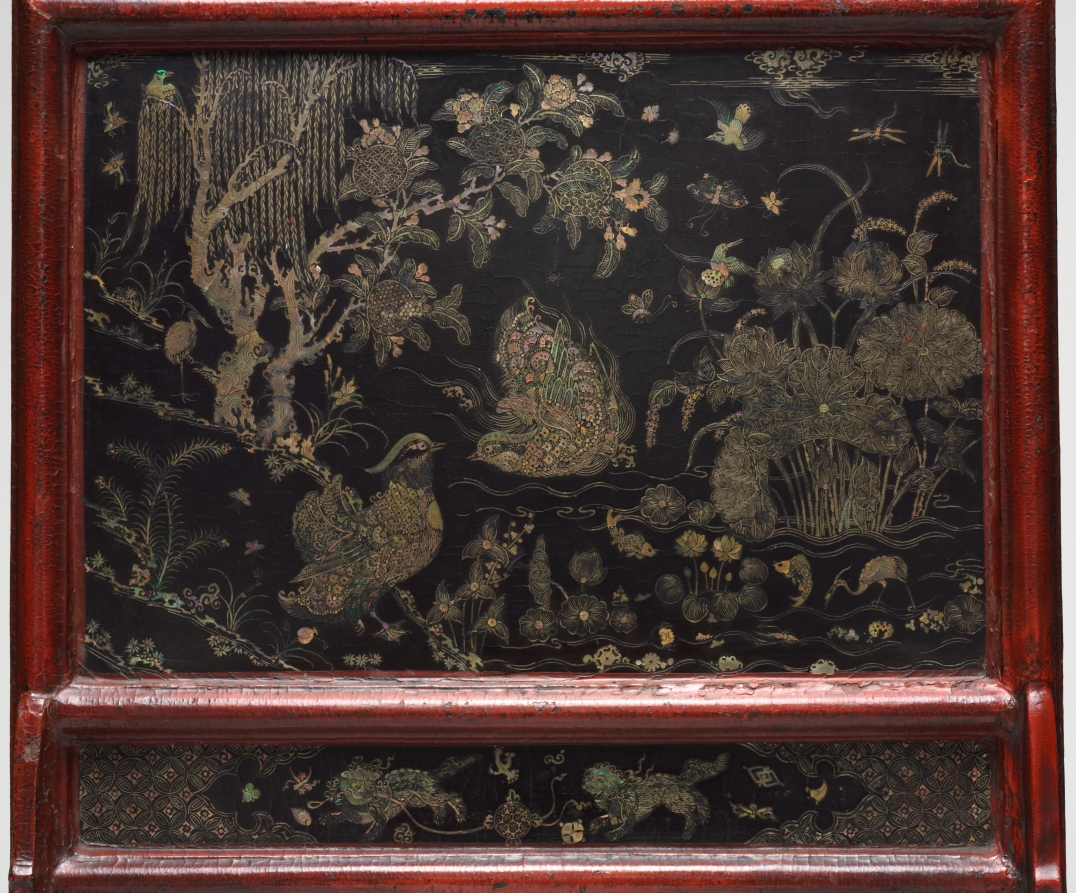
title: Table Screen: The Peach Blossom Spring, Land of the Immortals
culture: China, Yuan dynasty (1271-1368)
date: 1300s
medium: lacquer on wood with mother-of-pearl inlay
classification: Lacquer